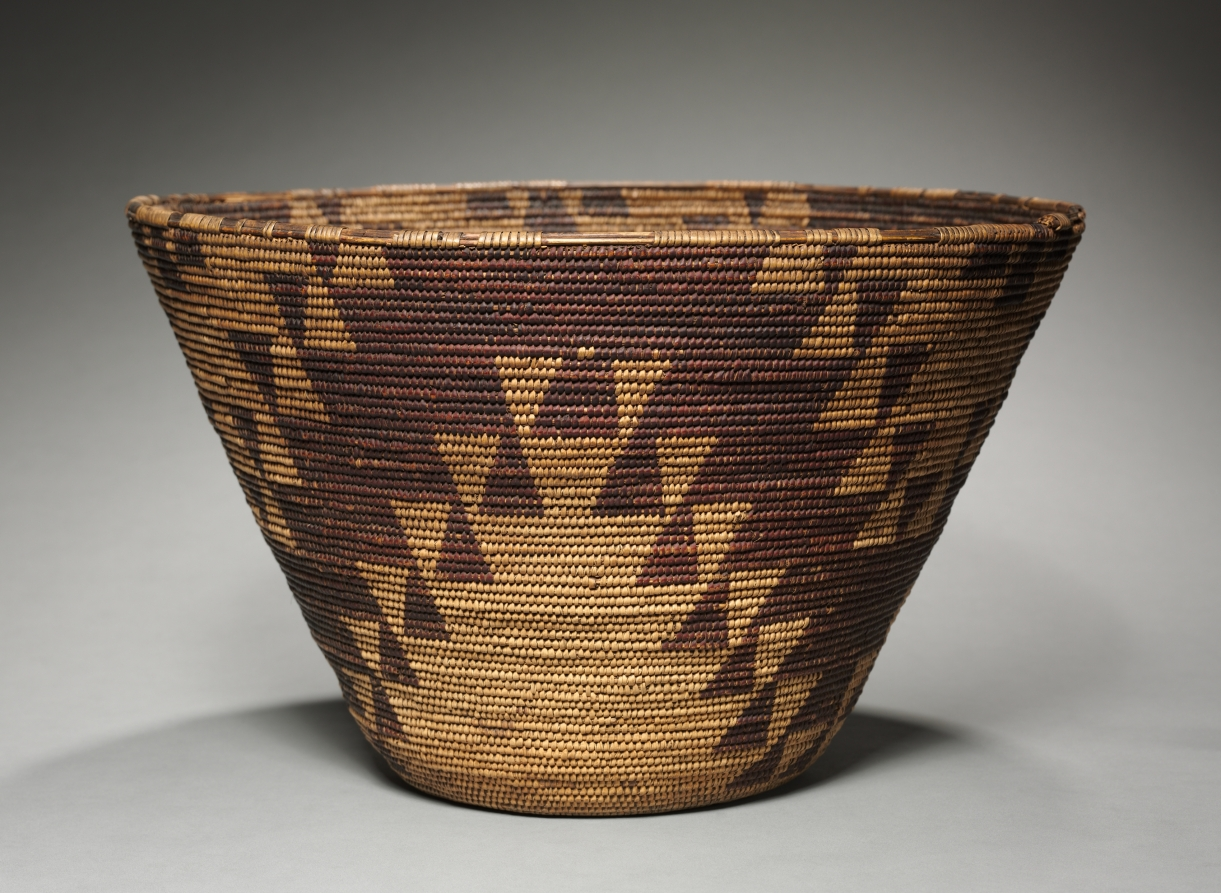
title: Cooking Bowl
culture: California, Maidu, Southern (Nisenan), Unassigned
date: Unassigned, before 1917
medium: redbud, coiled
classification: Basketry